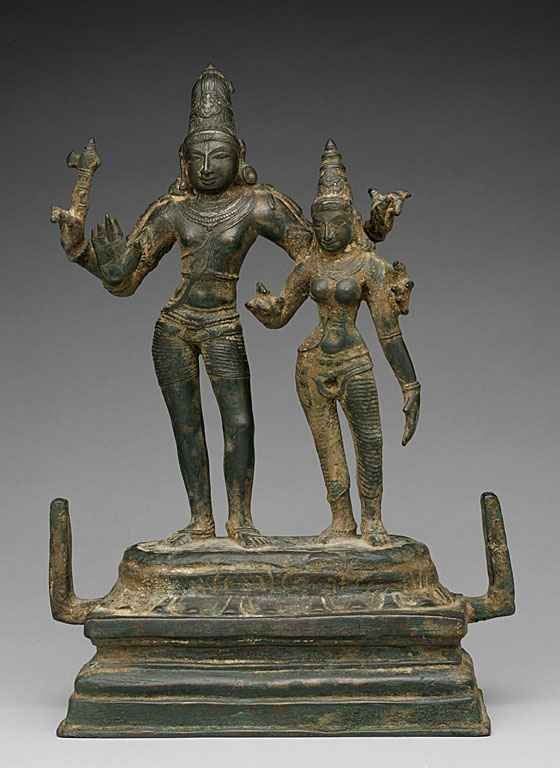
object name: Sculpture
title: Shiva Embracing Parvati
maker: India; Tamil Nadu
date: c. 13th century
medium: Bronze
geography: Tamil Nadu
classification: bronze; metal; sculpture; asian art